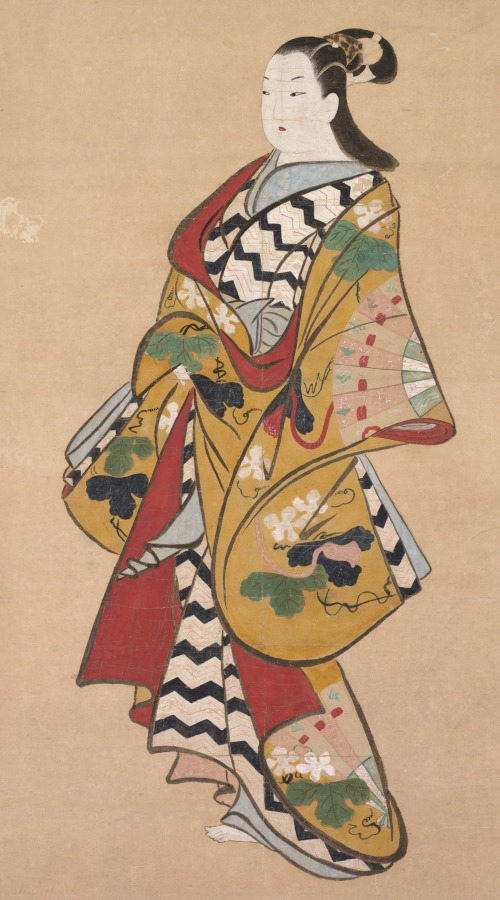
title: Courtesan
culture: Japan, Edo period (1615–1868)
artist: studio of Kaigetsudō Ando (Japanese, c. 1671–1743)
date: 1700s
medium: hanging scroll; ink and color paper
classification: Painting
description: Paintings of the courtesans who provided men with a sophisticated menu of appealing fashions, flattery, witty banter, music, dancing, and sexual services in the Yoshiwara district of the city of Edo (Tokyo) were the bread and butter of the Kaigetsudō studio, in whose style this work is painted. Their paintings emphasized bold, sweeping calligraphic ink lines in rendering the figures’ forms, along with high-contrast colors and patterns in their typically solitary subjects’ garments. Aside from the occasional prop or poem, the space around the dramatic figure was left entirely blank.